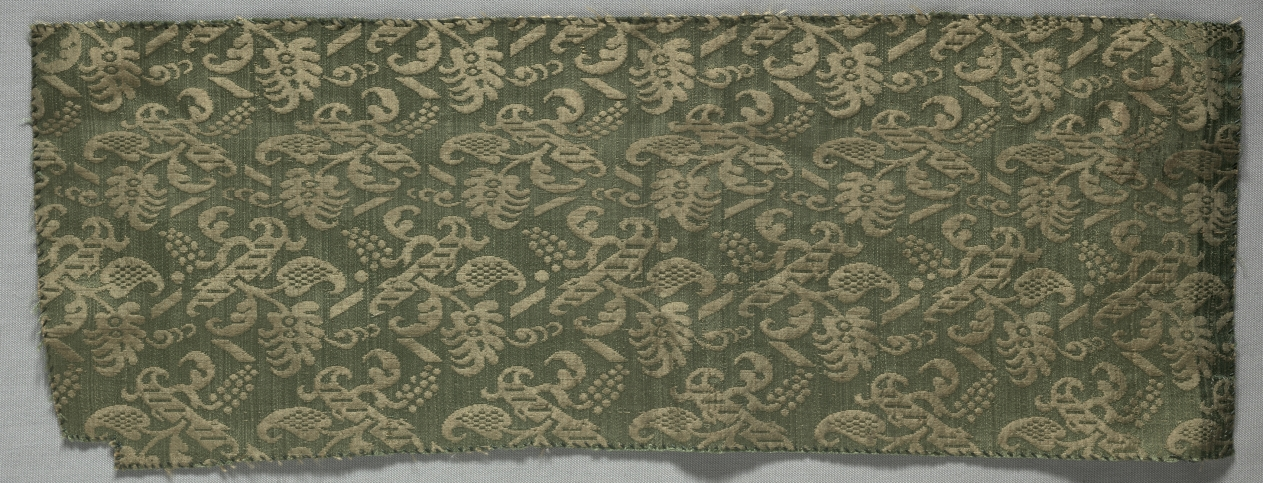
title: Textile Fragment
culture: Italy, Perugia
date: 1500s - 1600s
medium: satin, brocaded; silk and metal thread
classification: Textile